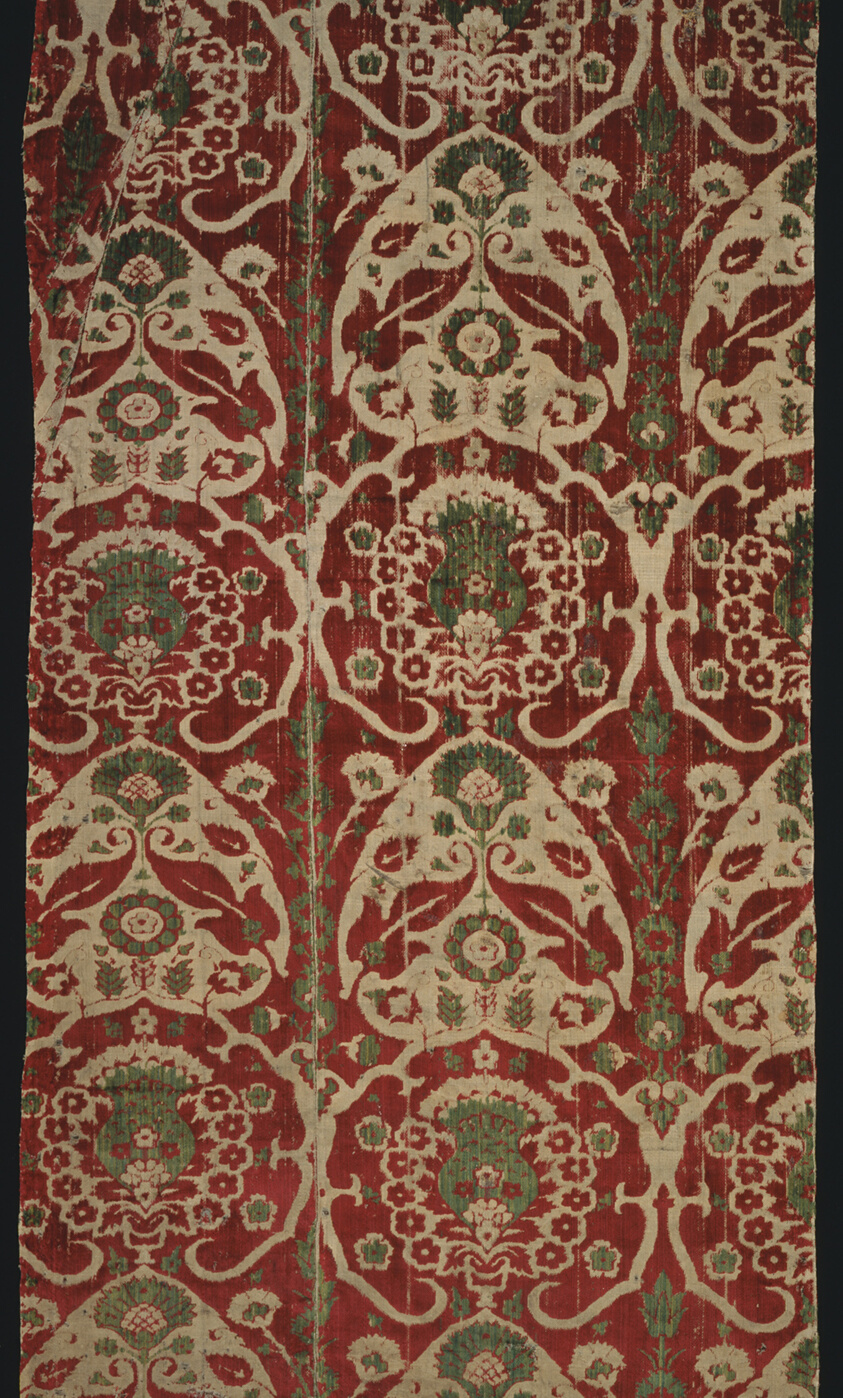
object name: Textile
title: Panel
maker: Italy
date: 15th century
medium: Silk, warp-float faced 4:1 satin weave with three-color supplementary pile warp forming cut, voided velvet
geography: Italy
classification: textile; weaving - velvet